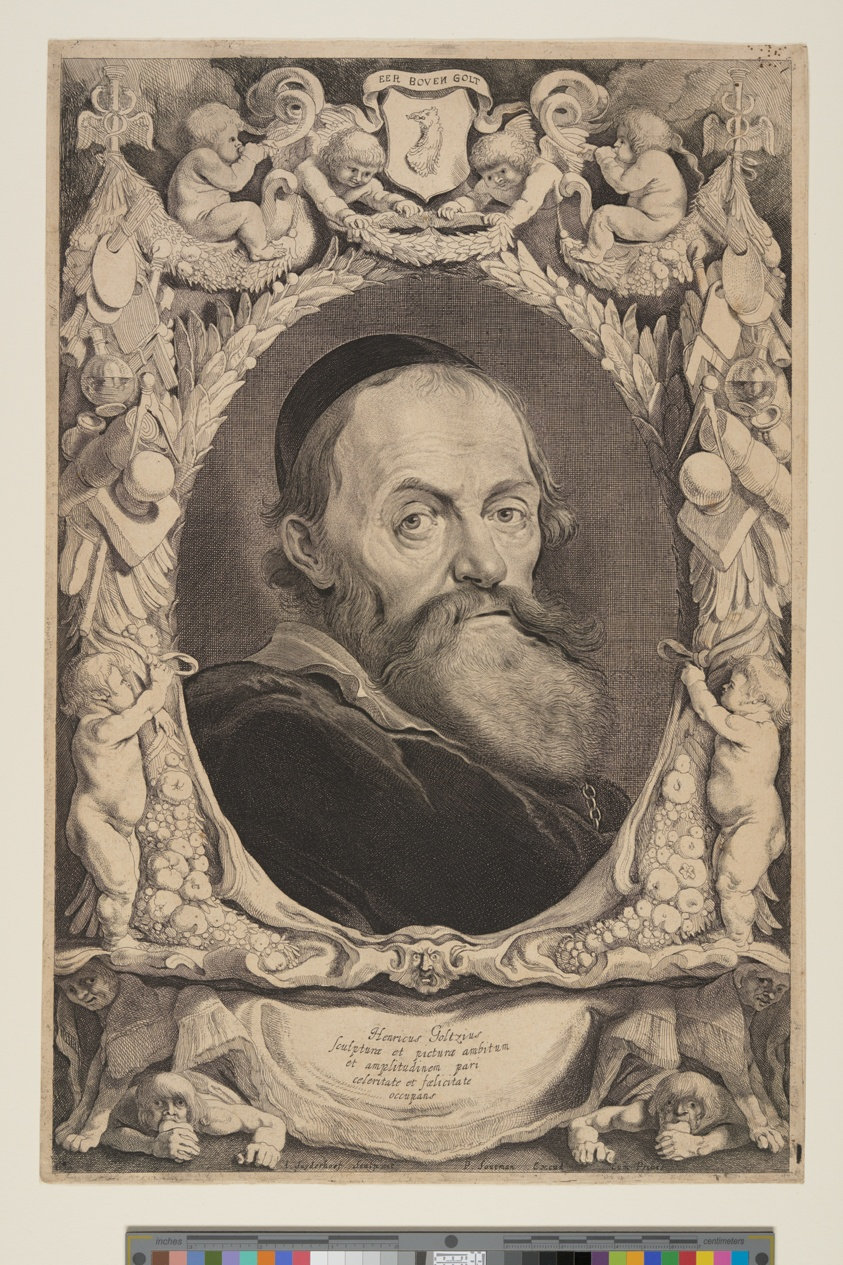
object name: Print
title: Hendrick Goltzius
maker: Jonas Suyderhoef (Dutch, c. 1613–1686)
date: c. 1649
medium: Etching and engraving on ivory laid paper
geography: Netherlands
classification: etching; paper; print; prints and drawing